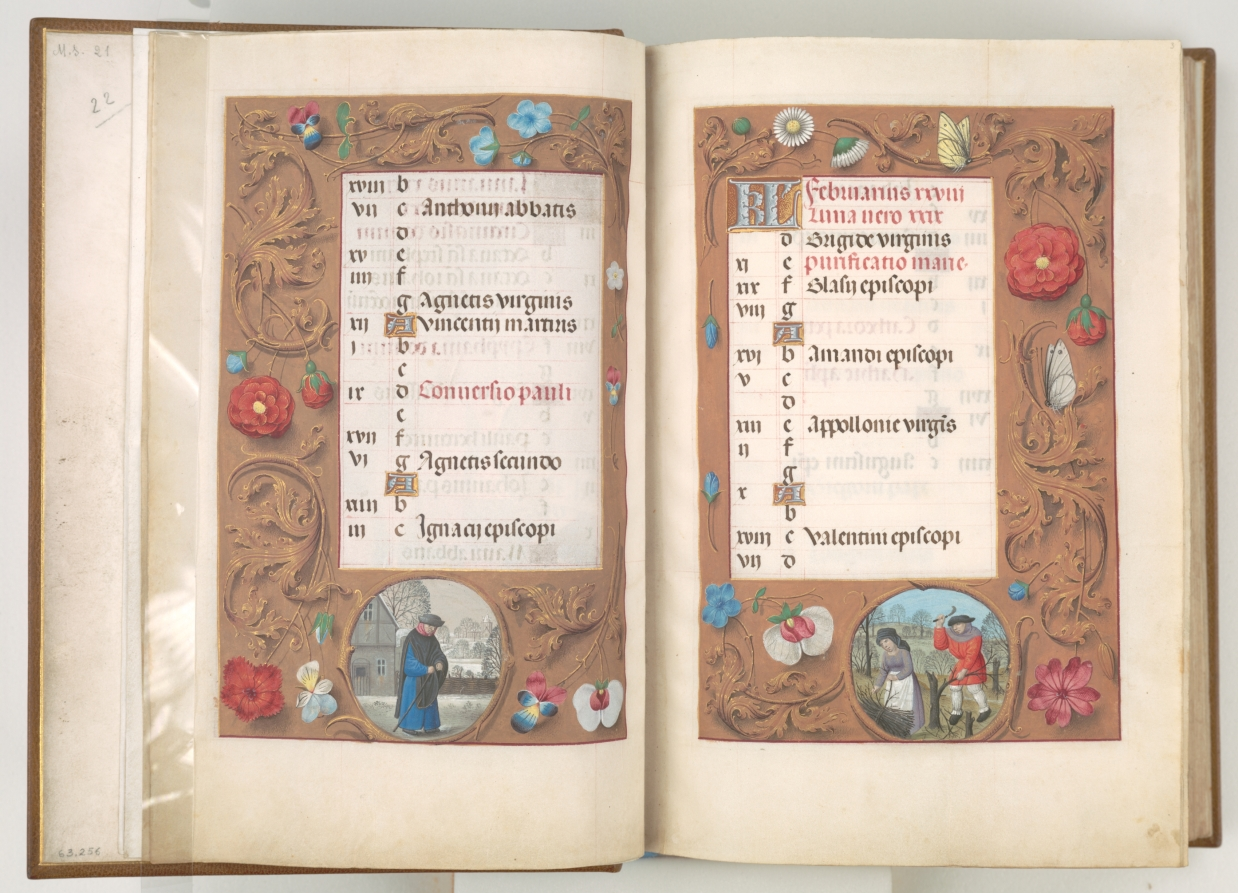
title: Hours of Queen Isabella the Catholic, Queen of Spain: Fol. 2v, January - Snow Landscape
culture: Flanders, Ghent and Bruges, late 15th century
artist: Master of the First Prayerbook of Maximillian (Flemish, c. 1444–1519)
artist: and Associates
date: c. 1500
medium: ink, tempera, and gold on vellum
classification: Bound Volume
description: This manuscript was illuminated by a circle of at least five highly organized manuscript painters active in the Flemish cities of Ghent and Bruges. The principal illuminator was Alexander Bening, who painted the majority of the book's miniatures. Manuscripts produced by this circle of artists are renowned for the decoration of their borders, which typically feature a rich variety of realistically painted flowers, birds, and butterflies. This prayer book, called a book of hours, was intended not for a cleric but for the private devotions of a lay person—in this case, Isabella the Catholic, Queen of Spain (1451–1504); her coat of arms embellishes the book's frontispiece. It is unlikely that the book was commissioned by the Queen herself; rather, she probably received it as a diplomatic gift from someone courting her patronage, perhaps Cardinal Francisco Jimenez de Cisneros. A Franciscan friar, Jimenez was dependent upon Isabella for his advancement, first to the post of Queen's confessor in 1492, and then to Archbishop of Toledo in 1495.